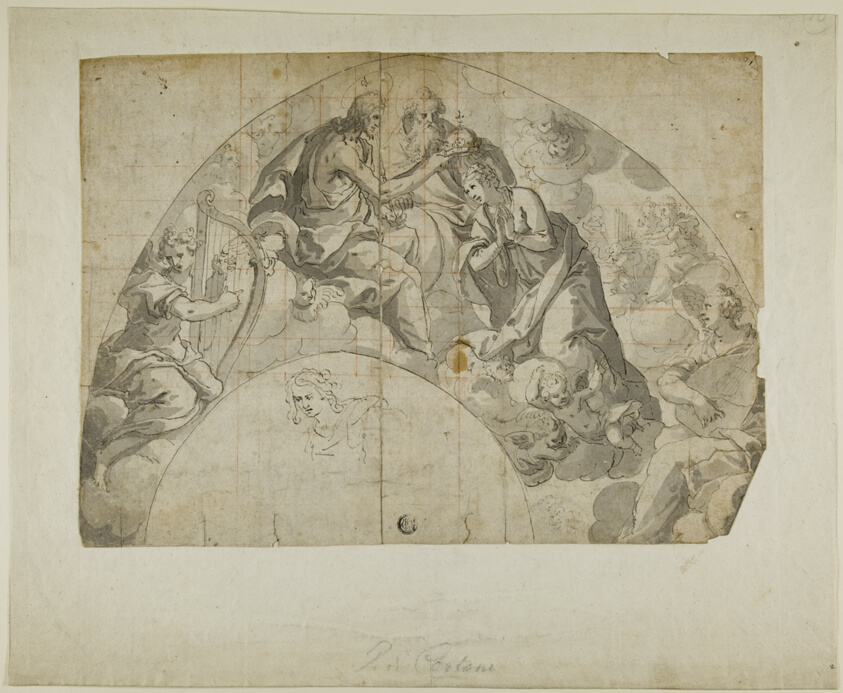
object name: Drawing and Watercolor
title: Spandrel Design for Coronation of Virgin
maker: Unknown Artist (possibly German or Sienese, 16th century); or Pietro da Cortona (Italian, 1596-1669); or Ventura Salimbeni (Italian, 1567/68-1613)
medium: Pen and black ink, with brush and gray wash, squared in red chalk, on ivory laid paper, laid down on ivory laid paper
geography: Italy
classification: ink or chalk wash; drawings (visual works); prints and drawing